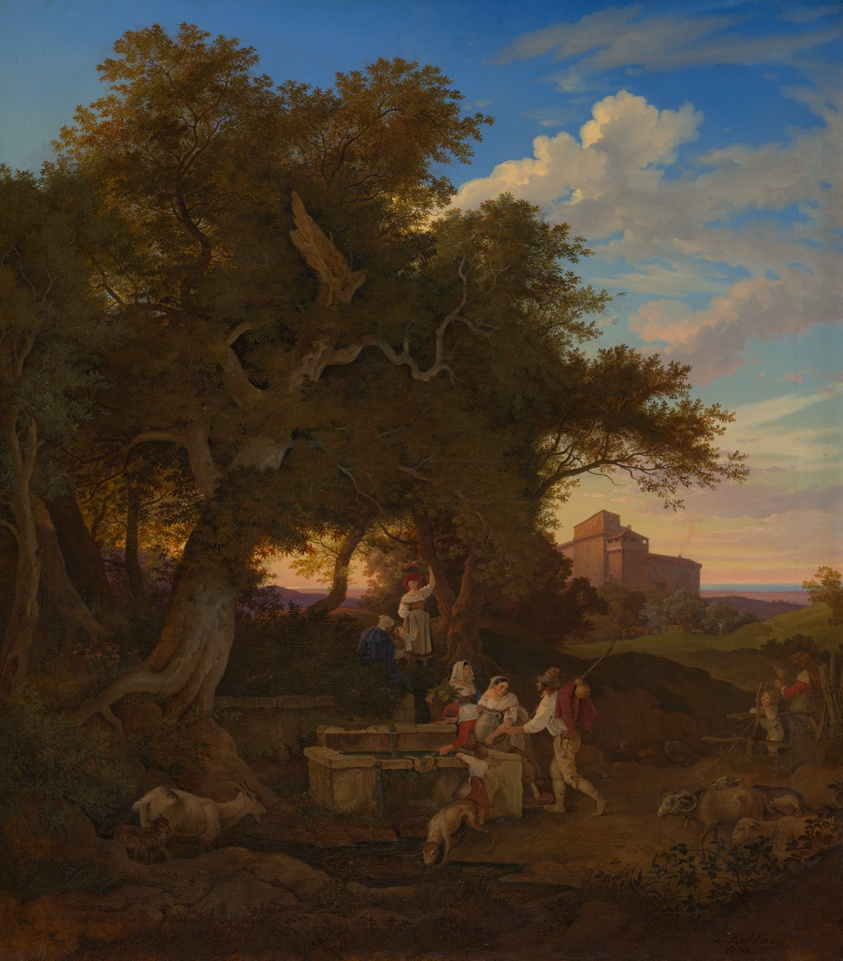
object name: Painting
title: The Fountain at Grottaferrata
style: nineteenth century, 19th century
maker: Ludwig Richter (German, 1803–1884)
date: 1832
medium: Oil on canvas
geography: Germany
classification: painting; german; oil on canvas; oil paintings (visual works); paint; european painting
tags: fountains, women, water, trees, sky, men, leisure, landscape, Italy, goats, figures, dog, countryside, clouds, children, building, animals